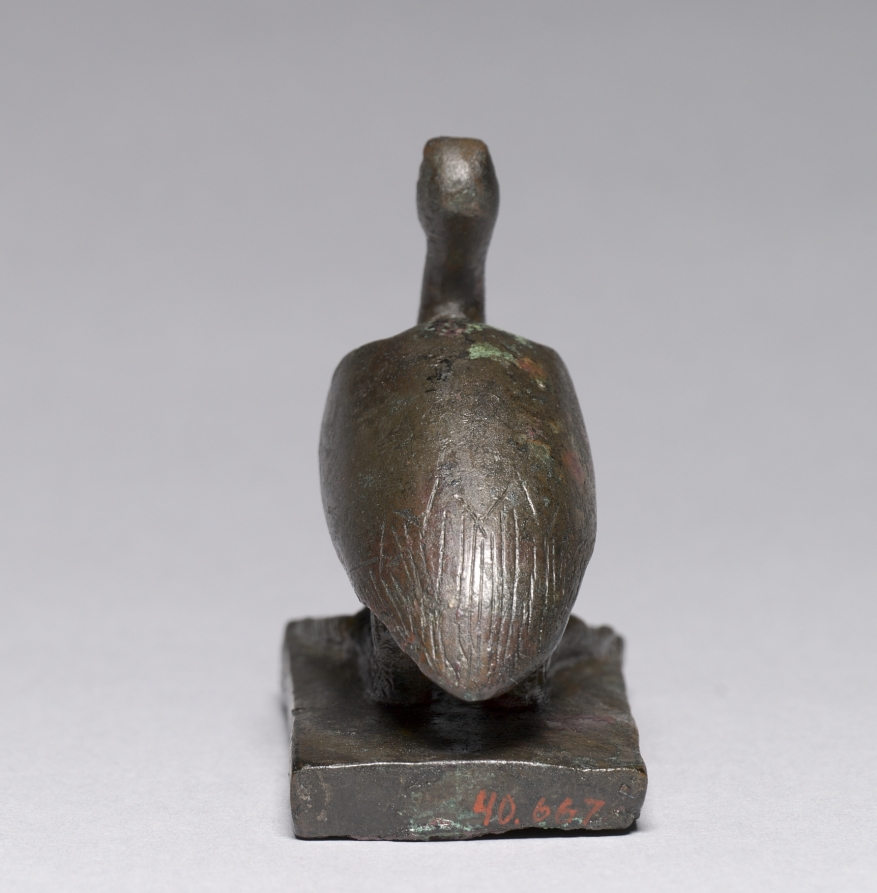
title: Ibis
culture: Egypt, Late period (715–332 BCE), Dynasty 26 or later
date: 664–30 BCE OR 664–330 BCE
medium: bronze, solid cast, with gold-rich inlays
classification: Sculpture